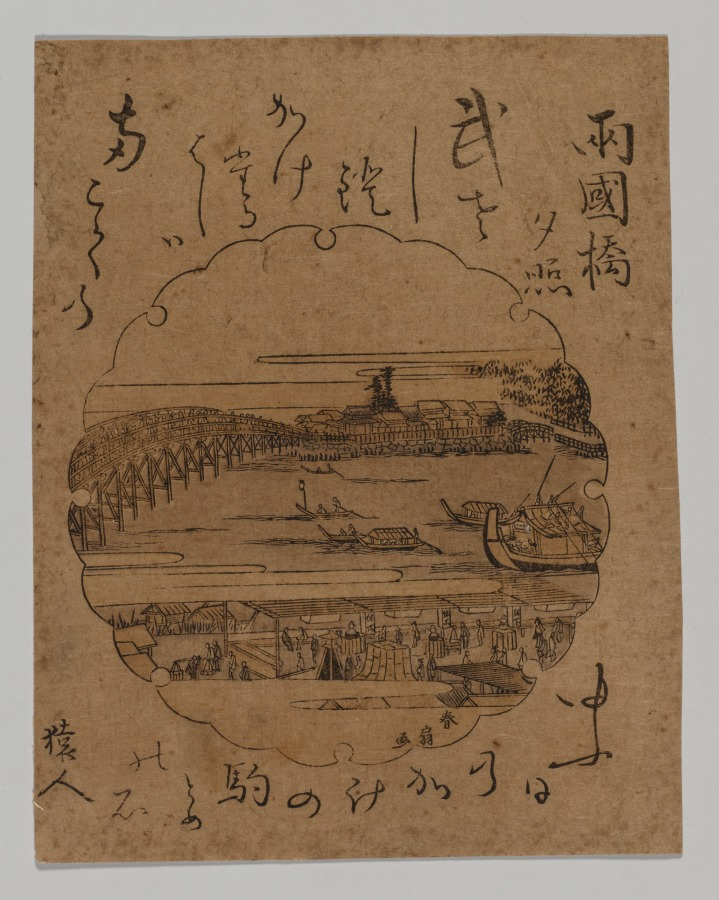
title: Sunset at Ryōgoku Bridge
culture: Japan, Edo period (1615–1868)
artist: Katsukawa Shunkō II (Shunsen) (Japanese, c. 1762-c. 1821)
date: 1806–20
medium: Woodblock print; ink and color on paper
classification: Print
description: A view of boats and riverside stalls near the Ryōgoku Bridge is captured in a roundel. The scene is accompanied by a poem. Much faded today, traces of the colors used to indicate the last rays of the sun remain. The artist signed the print “design by Shunsen” (Shunsen ga), a name he used from New Year’s of 1806, after he became a student of Katsukawa Shun’ei (1762-1819). Around the year 1820, he took the name Shunkō II. He designed prints of beauties, actors, and landscapes. In his final years, he painted designs on ceramics.